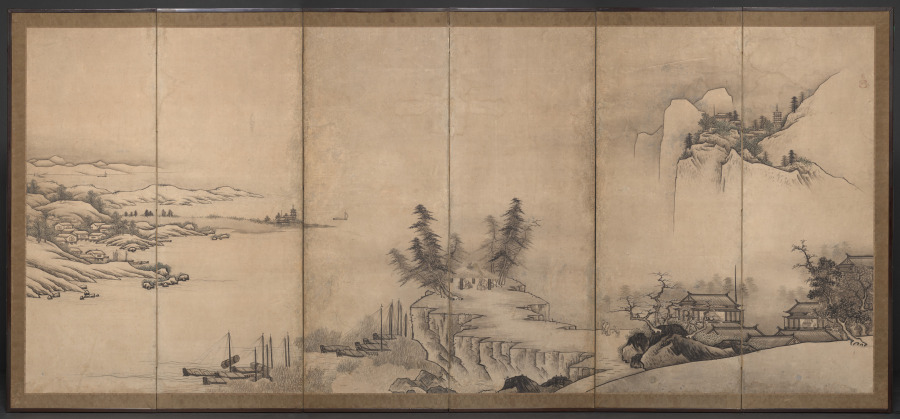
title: Chinese Pavilions in a Landscape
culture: Japan, Edo period (1615–1868)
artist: Unkoku Tōeki (Japanese, 1591–1644?)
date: 1600s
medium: Six-panel folding screen, ink and light color on paper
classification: Painting